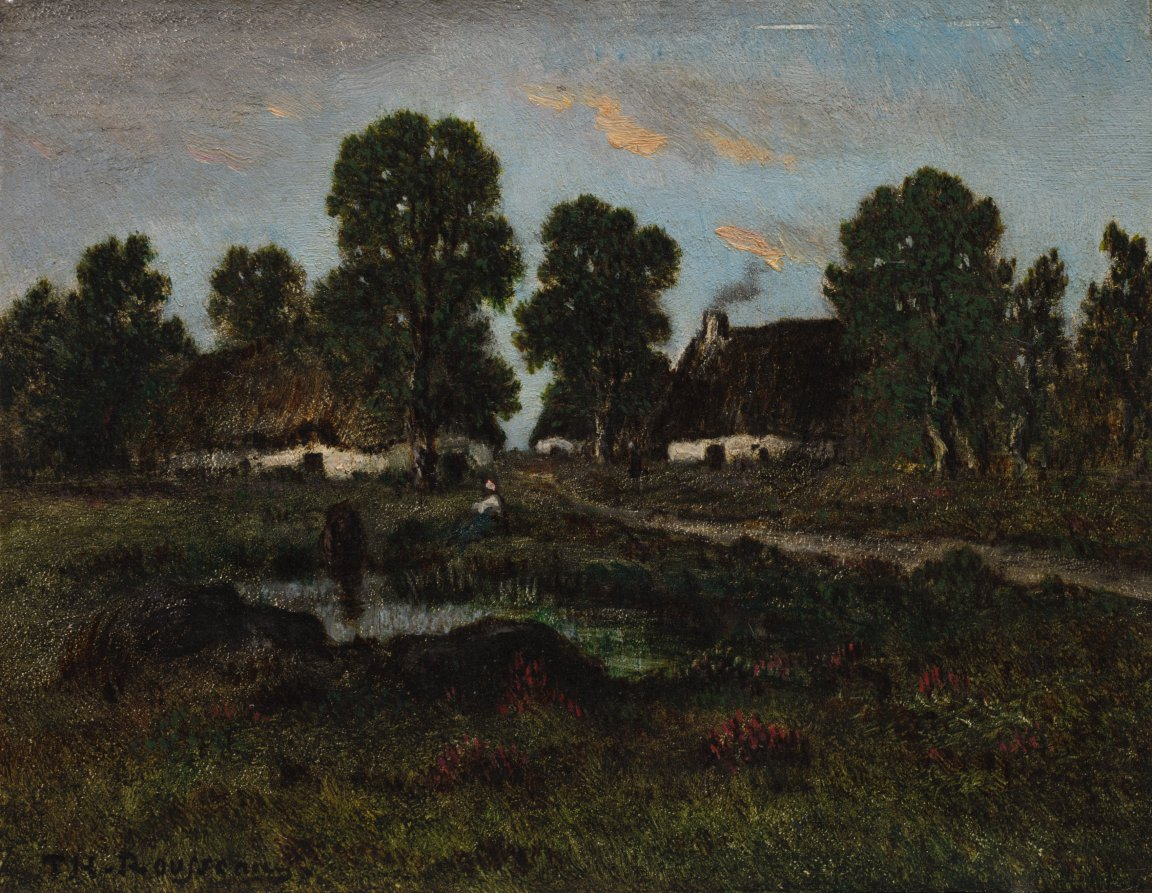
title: Cottages Near Larchant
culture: France, 19th century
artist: imitator of Théodore Rousseau (French, 1812–1867)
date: not dated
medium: oil on wood panel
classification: Painting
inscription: Signed lower left: TH. Rousseau